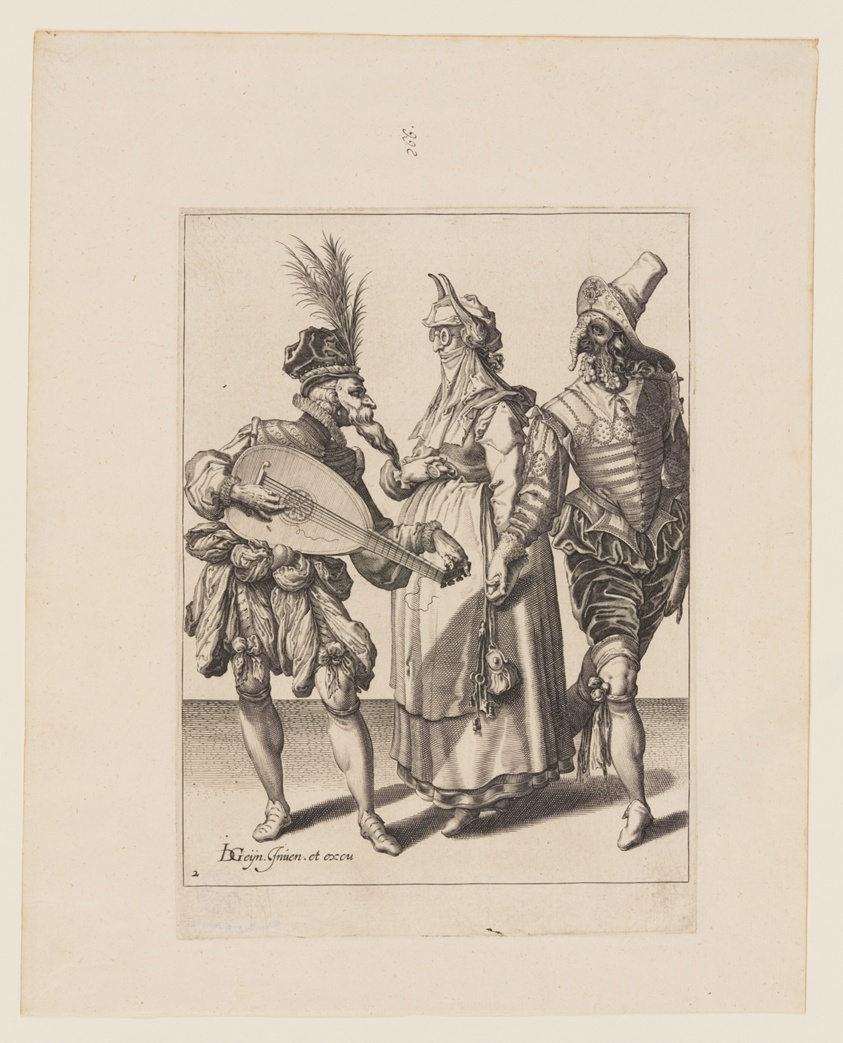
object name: Print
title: A Couple Addressed by a Lute Player, from The Masquerades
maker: Jacques de Gheyn II; Dutch, 1565–1629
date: 1595-96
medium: Engraving on ivory laid paper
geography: Netherlands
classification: engraving; paper; print; prints and drawing